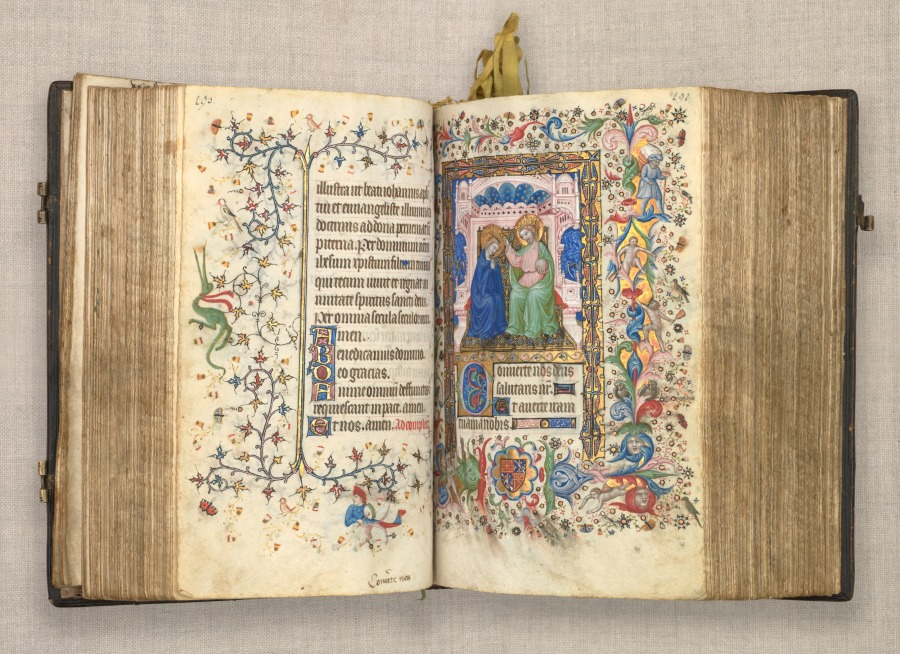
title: Hours of Charles the Noble, King of Navarre (1361-1425): fol. 96r, Coronation of the Virgin (Compline)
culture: France, Paris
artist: Master of the Brussels Initials and Associates (French)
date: c. 1405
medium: ink, tempera, and gold on vellum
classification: Bound Volume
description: This precious volume was obviously highly prized by its owner, the French-born King of Navarre, who had his coat of arms painted on no less than twenty folios. Rather than directly commissioning this manuscript from a specific workshop, it seems that Charles the Noble acquired his book of hours -- perhaps ready-made for the luxury market -- while on a trip to Paris in 1404-05. A collaborative effort, six painting styles are evidenced within the pages of this codex, those of two Italians, two Frenchmen, and two Netherlanders. The painter who was responsible for the planning and decoration of the book, and who produced seventeen of the large miniatures, was a Bolognese artist known as the Master of the Brussels Initials. His principal assistant, responsible for most of the borders, was a Florentine who signed his name "Zecho" da Firenze on folio 208 verso.